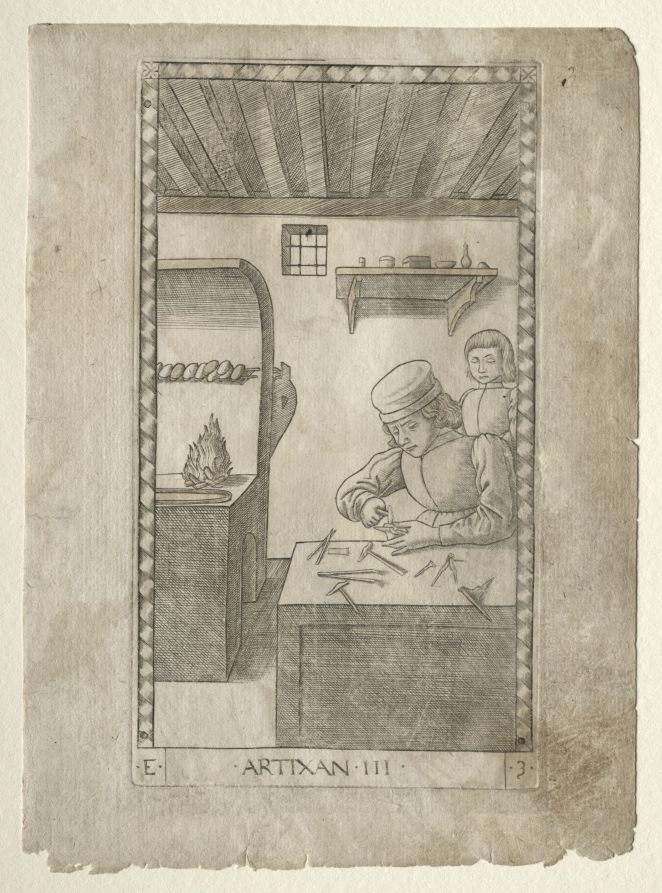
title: The Artisan (from the Tarocchi, series E: Conditions of Man, #3)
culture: Italy, Ferrara, 15th century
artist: Master of the E-Series Tarocchi (Italian, active 1460s)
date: before 1467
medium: engraving hand-colored with gold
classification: Print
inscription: Lettered below the image of Artixan (The Artisan): ·E· / ·ARTIXAN·III· / ·3·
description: This engraving is part of the Tarocchi group marked with the letter “E,” and named Conditions of Man. This series outlines the social and hierarchical order of ten characters (Beggar, Servant, Artisan, Merchant, Gentleman, Knight, Doge King, Emperor, and Pope), starting from the lower grade and ending with the most important one. Here, Artixan (The Artisan) is shown as a male figure, working from behind a desk in his workshop. In the background, a fire is burning on the left, while an apprentice is standing behind the artisan on the right.